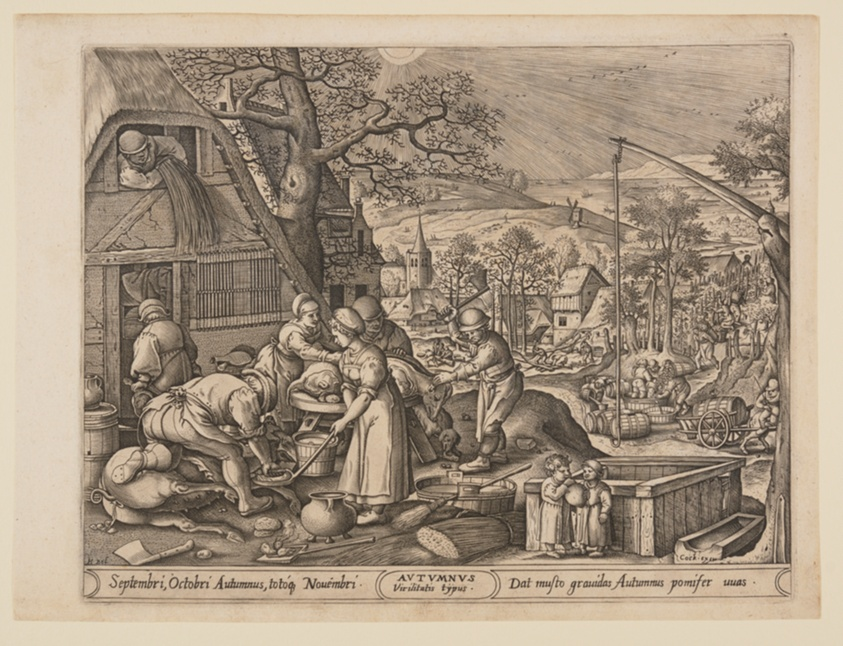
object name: Print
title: Autumn, from The Four Seasons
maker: Pieter van der Heyden (Flemish, c. 1530–after 1572); Hans Bol (Flemish, 1534–1593)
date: 1570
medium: Engraving on ivory laid paper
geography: Flanders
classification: print; paper; prints and drawing; engraving